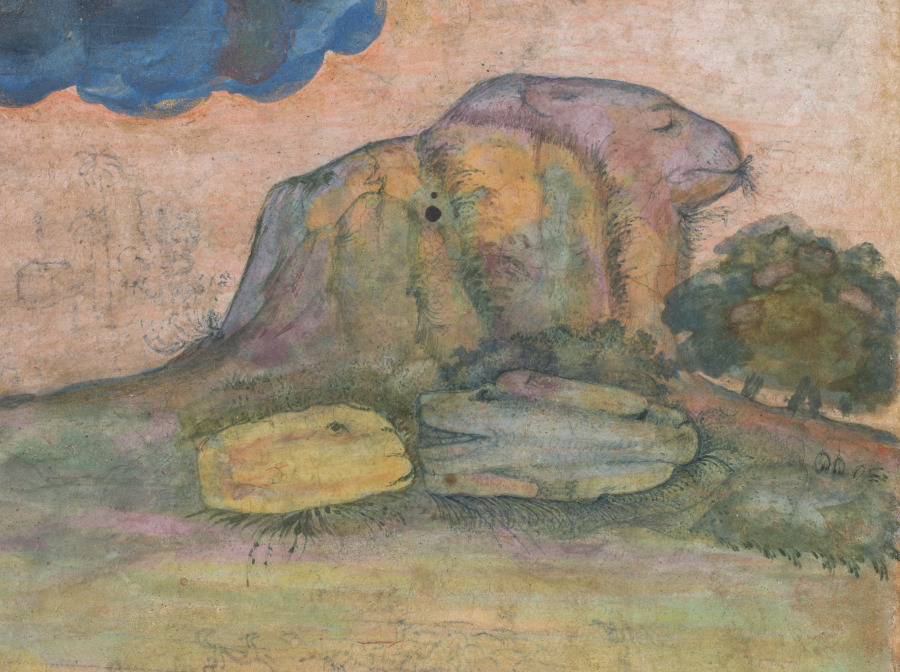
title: Angels bring food to Jesus in the wilderness (folio 55 recto), from a Mirror of Holiness (Mir’at al-quds) of Father Jerome Xavier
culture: Mughal India, Allahabad, made for Prince Salim (1569–1627)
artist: Muhammad Sharif (Indian, active c. 1600)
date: 1602–4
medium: Gum tempera, ink, color, and gold on paper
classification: Manuscript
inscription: Signature of the artist, Muhammad Sharif (Indian, active c. 1600), is written in the tiny pot by Jesus's foot.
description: To end his 40-day fast, five angels brought Jesus refreshments from heaven: breads, melons each with a knife for convenient cutting, fresh leeks, and what appear to be fragrant rice dishes and curries, along with cups of wine. Four of the angels are dressed in robes, and one is clothed only in feathers. After his baptism, Jesus spent 40 days and nights in the desert where he fasted, practiced spiritual exercises, and successfully resisted the temptations of Satan. Many of the rocks in this painting have faces, called grotesques. This page is the only surviving folio from this manuscript that has an artist’s signature, written in the tiny pot by Jesus’s foot.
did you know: The artist has put faces in the rocks, following a Persian convention.